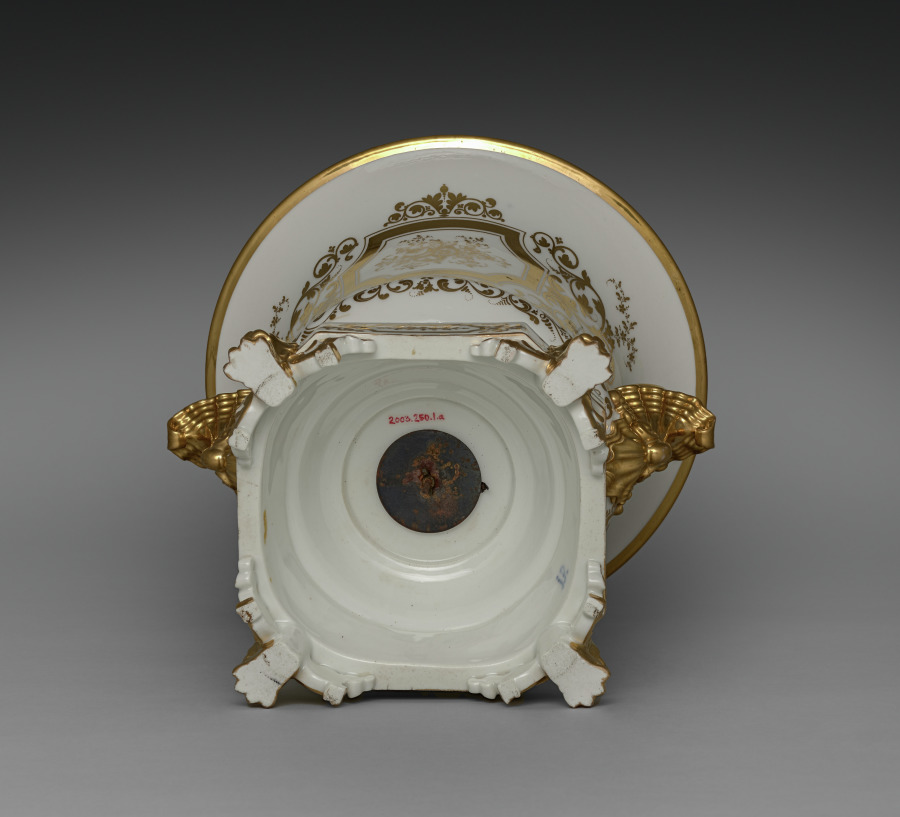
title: Ice Cream Pail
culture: France, Paris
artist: Factory of Jacob-Petit (French, 1830–1865)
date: c. 1840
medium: gilt porcelain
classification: Ceramic